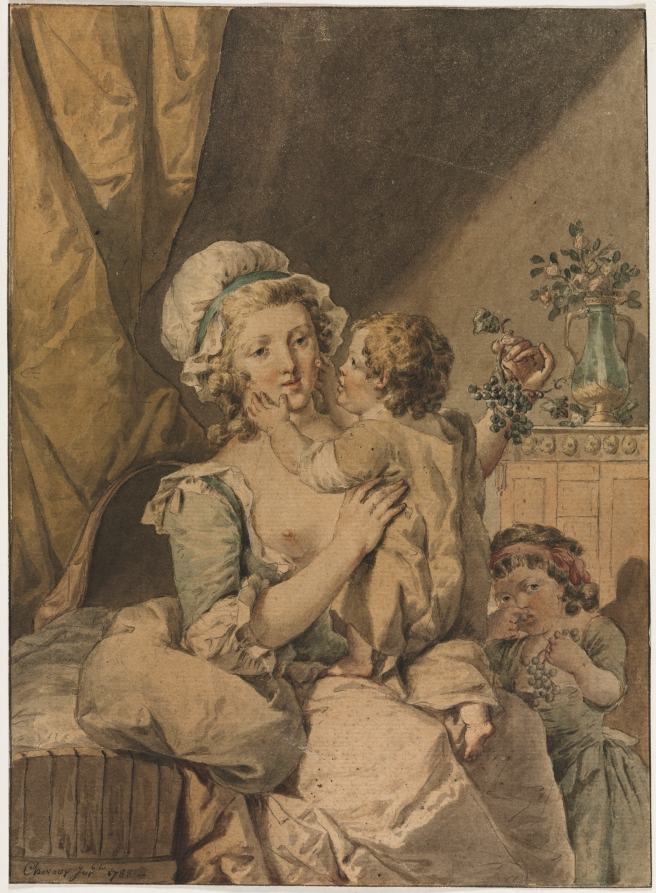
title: Mother with Two Children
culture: France, 18th century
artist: Henri Chevaux (French, 1723–1789)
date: 1788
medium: watercolor with black ink underdrawing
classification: Drawing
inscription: inscribed in black ink, lower left: "Chevaux [indecipherable] 1788